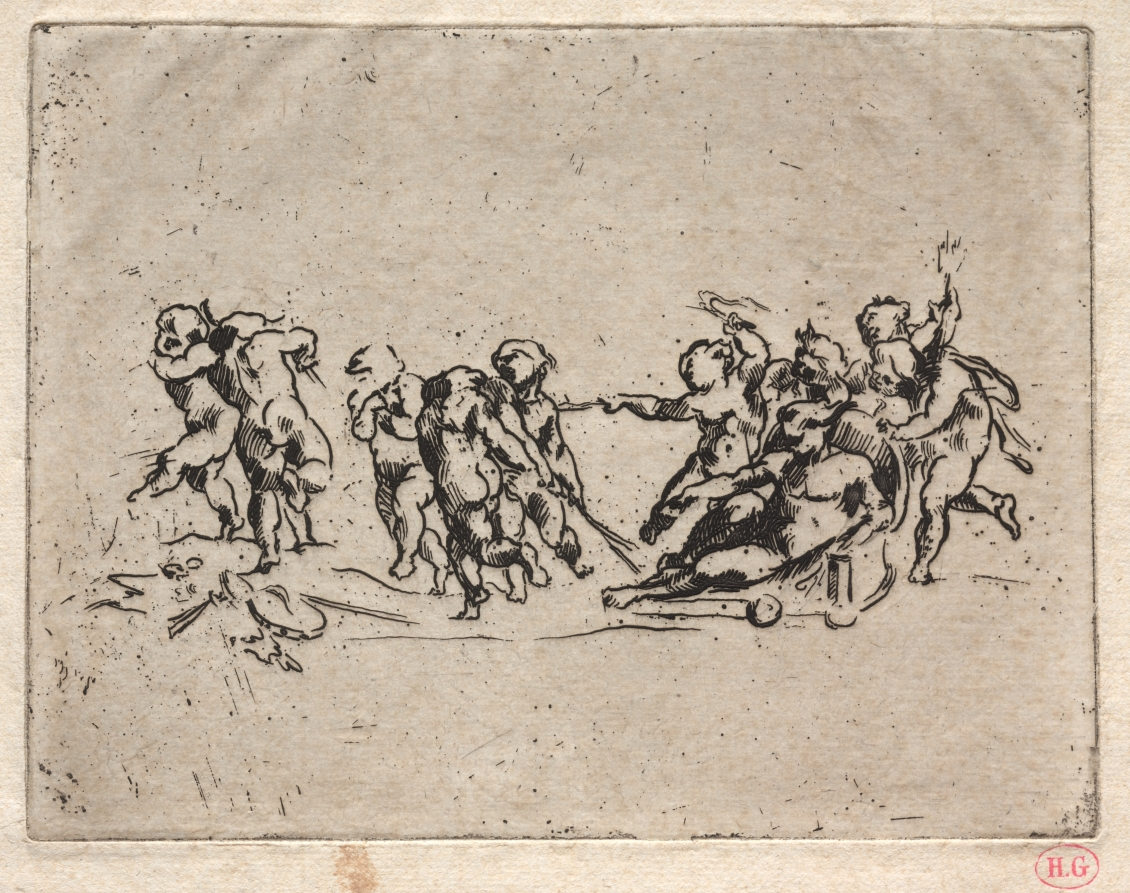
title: Bacchanal with Children and Chariot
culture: France, 19th century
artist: Jean-Baptiste Carpeaux (French, 1827–1875)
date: c. 1860–70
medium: etching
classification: Print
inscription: below the lower right platemark edge: stamp for Hector Giacomelli (Lugt 1311)